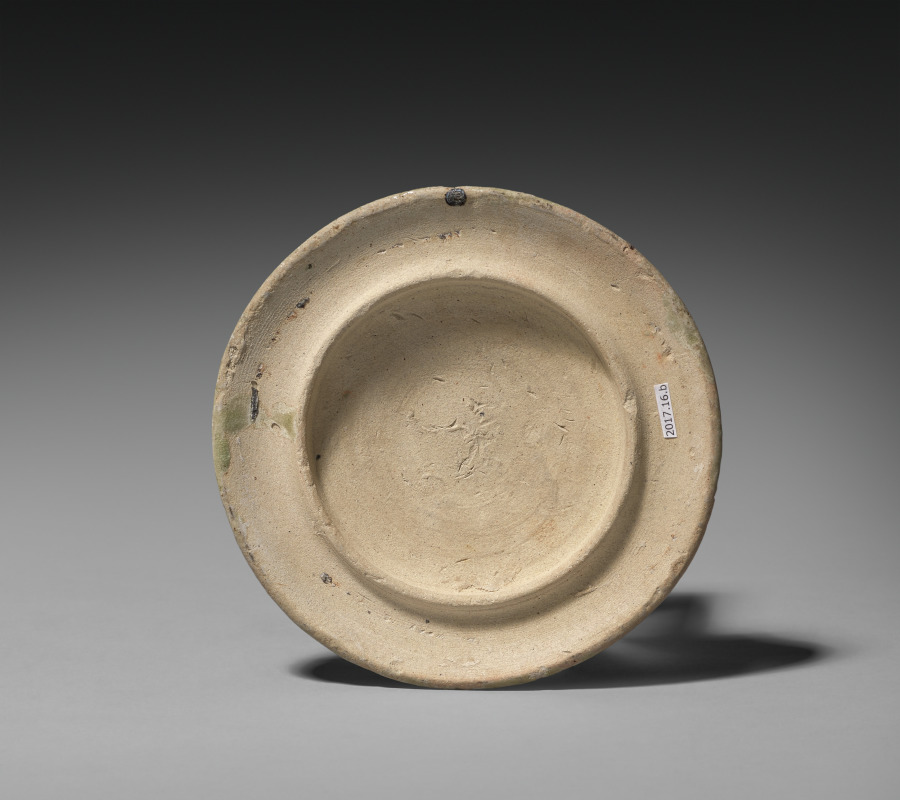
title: Covered Jar with Carved Lotus Petals (lid)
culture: China, Northern Dynasties period (386-581)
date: 386–581 CE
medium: Glazed stoneware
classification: Ceramic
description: This jar still has its original cover, which is rare among surviving examples. Its missing knob most likely had the shape of a lotus bud. Beautifully carved lotus petals cover the vessel’s shoulder and lid under a translucent green glaze. In Buddhism, the lotus is a flower symbolizing purity and detachment from worldly affairs; its presence suggests that this vessel was meant to be used in a religious context. The well-crafted double loop handles may have held a silk cloth or other textile that would have been folded over the lid to keep it in place. This aesthetic prefigures the celebrated green celadons in adjacent regions.